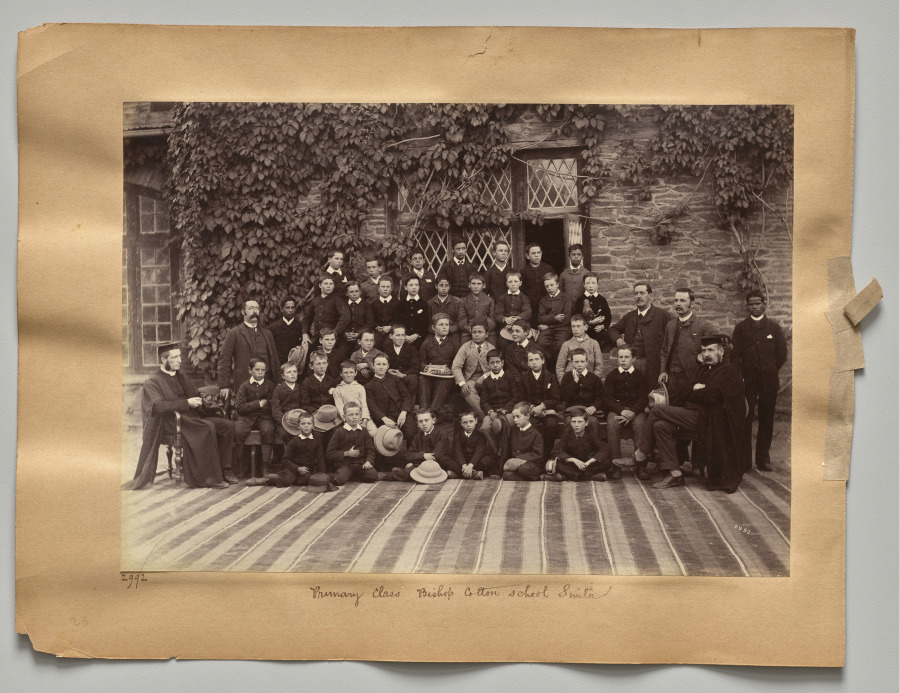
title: Primary Class, Bishop Cotton School, Shimla (recto)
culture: India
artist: Raja Deen Dayal (Indian, 1844–1905)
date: c. 1882–87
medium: albumen print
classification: Photograph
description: These photographs are part of an album, now disassembled, of around 105 photographs taken in India between 1885 and summer 1887 that provide glimpses into the lives of the British colonial elite and royal and upper-class Indians. The museum holds another group of 37 pictures from this album (2016.266), which was probably commissioned by a British civil servant visiting or working in India around 1888 as a personal souvenir of his experiences there.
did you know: Raja Deen Dayal is regarded now, and was considered during his lifetime, to be India’s most important 19th-century photographer.